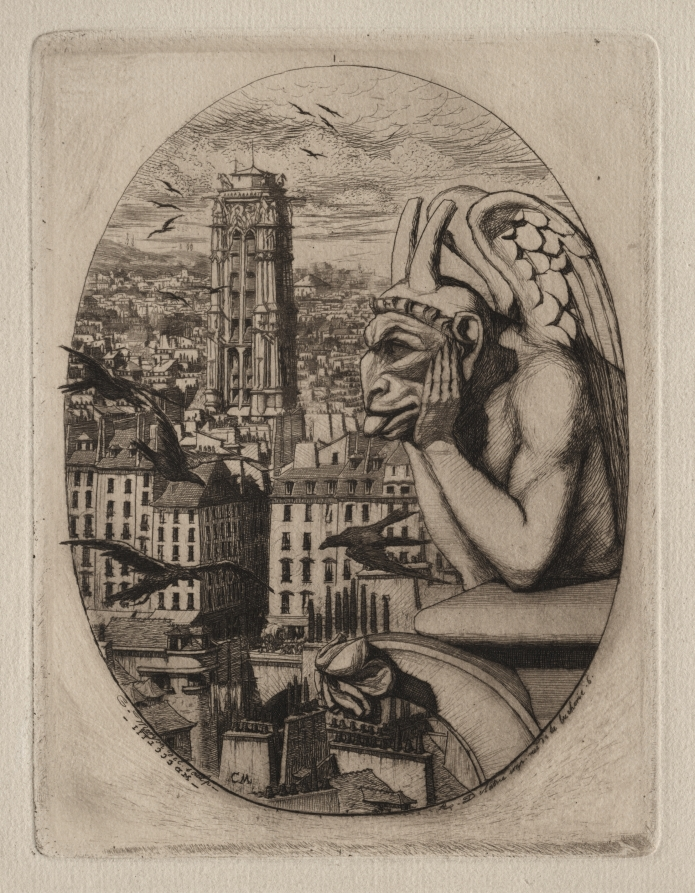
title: Etchings of Paris: The Gargoyle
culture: France, 19th century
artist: Charles Meryon (French, 1821–1868)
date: 1853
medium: etching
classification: Print